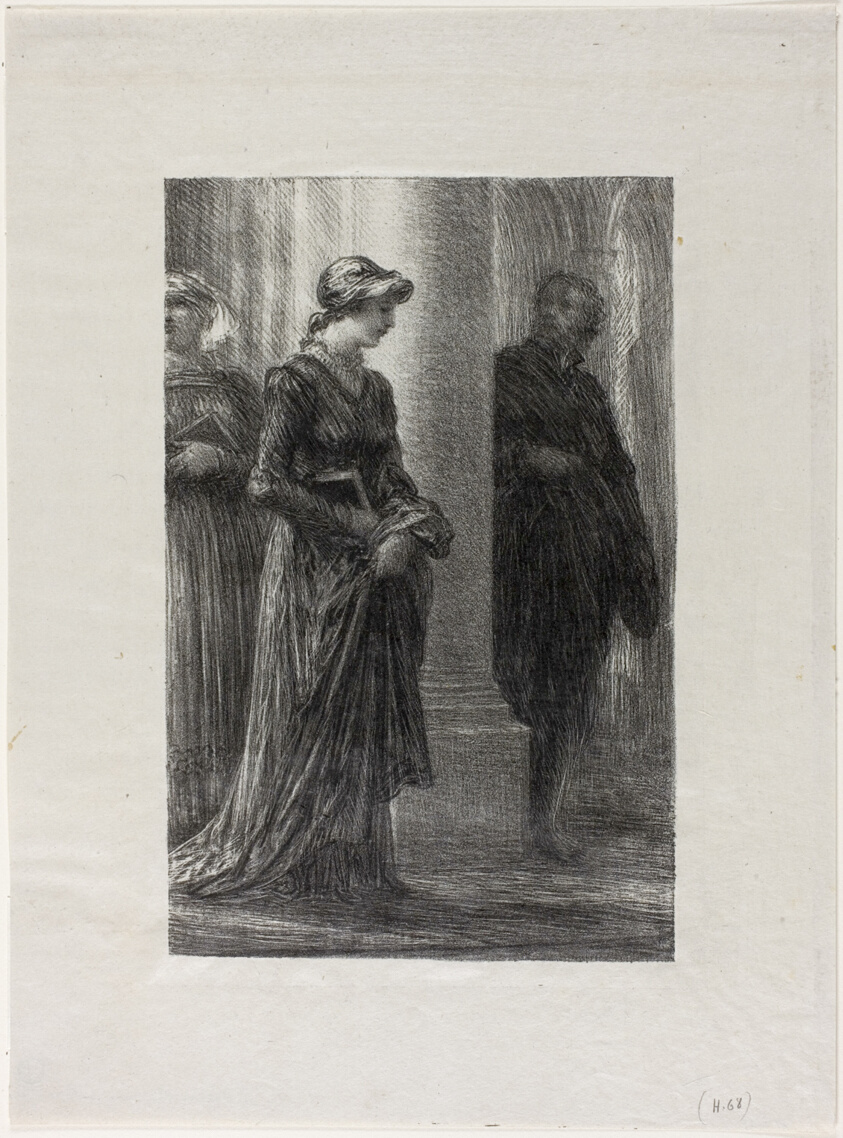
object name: Print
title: The Mastersingers of Nuremberg, Act I: Walther and Eva Meet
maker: Henri Fantin-Latour (French, 1836-1904)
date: c. 1886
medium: Lithograph in black on off-white chine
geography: France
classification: lithograph; print; prints and drawing